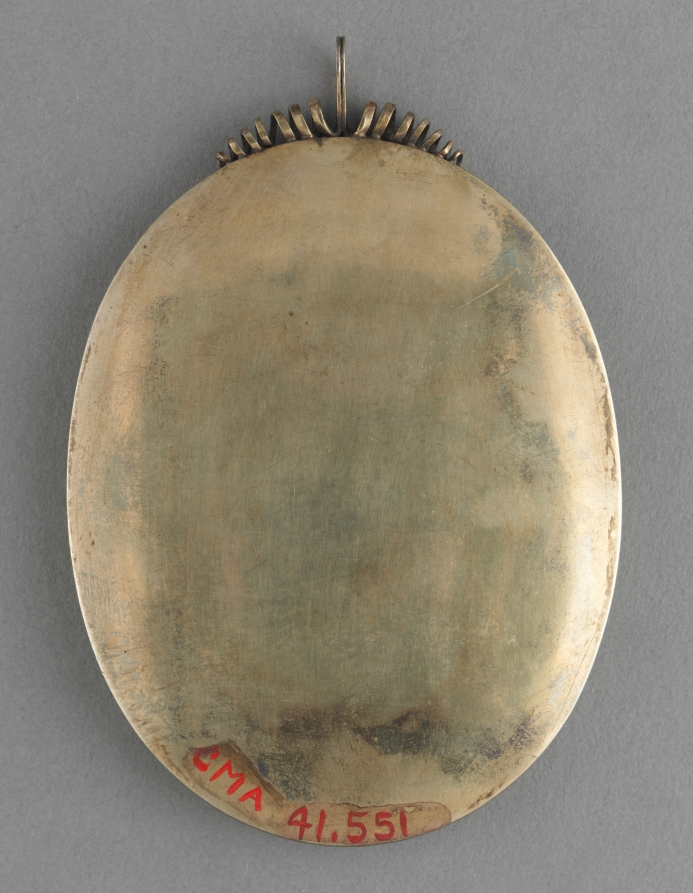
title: Portrait of a Man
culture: England, 17th century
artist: Samuel Cooper (British, 1608/09–1672)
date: c. 1655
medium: watercolor on vellum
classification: Portrait Miniature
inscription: signed left: SC [monogram]